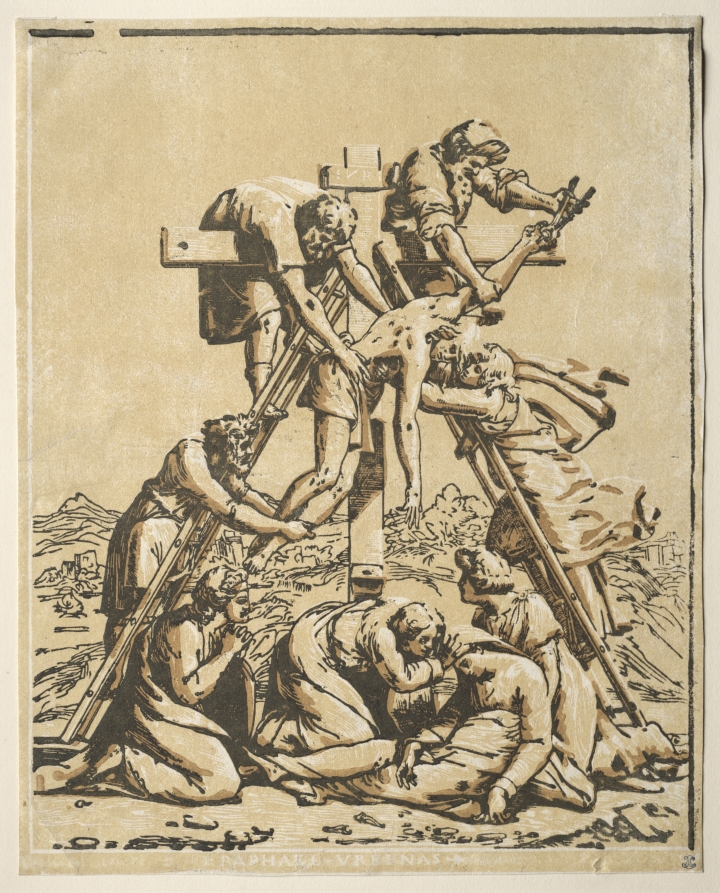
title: Descent from the Cross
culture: Italy, 16th century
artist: Ugo da Carpi (Italian, c. 1479–c. 1532)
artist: after Raphael (Italian, 1483–1520)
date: c. 1518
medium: chiaroscuro woodcut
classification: Print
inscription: Lower margin, in light tone block: °RAPHAEL°VRBINAS+ Lower right, on the small board, in light tone block: VGO DA CARPI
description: Ugo da Carpi was influential in the development of the chiaroscuro woodcut in Italy. The term chiaroscuro combines the Italian words chiaro (light) and scuro (dark). Invented to emulate drawings with light and dark pigments on tinted paper, the printing technique uses multiple woodblocks to layer different tones of color. The Descent from the Cross is one of the earliest chiaroscuro woodcuts by Ugo da Carpi. This print credits Raphael with its design: it was inspired by one of Raphael's now-lost drawings for a scene of Deposition that he should have painted in Loggie Vaticane. In a sketch-like hilly landscape, Christ's dead body is taken down from the cross by four men, one of whom is removing the nail from his right palm. Below, the three Marys attend the fainted Virgin. For this woodcut, Ugo used three different blocks—light brown, dark brown, and black.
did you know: This three-block chiaroscuro woodcut is known in two states. These differ for a small detail: the inscription with Raphael's name in the lower margin of the frame, and Ugo's name inscribed in the light tone block inside the small board at lower right, as seen in the CMA example.